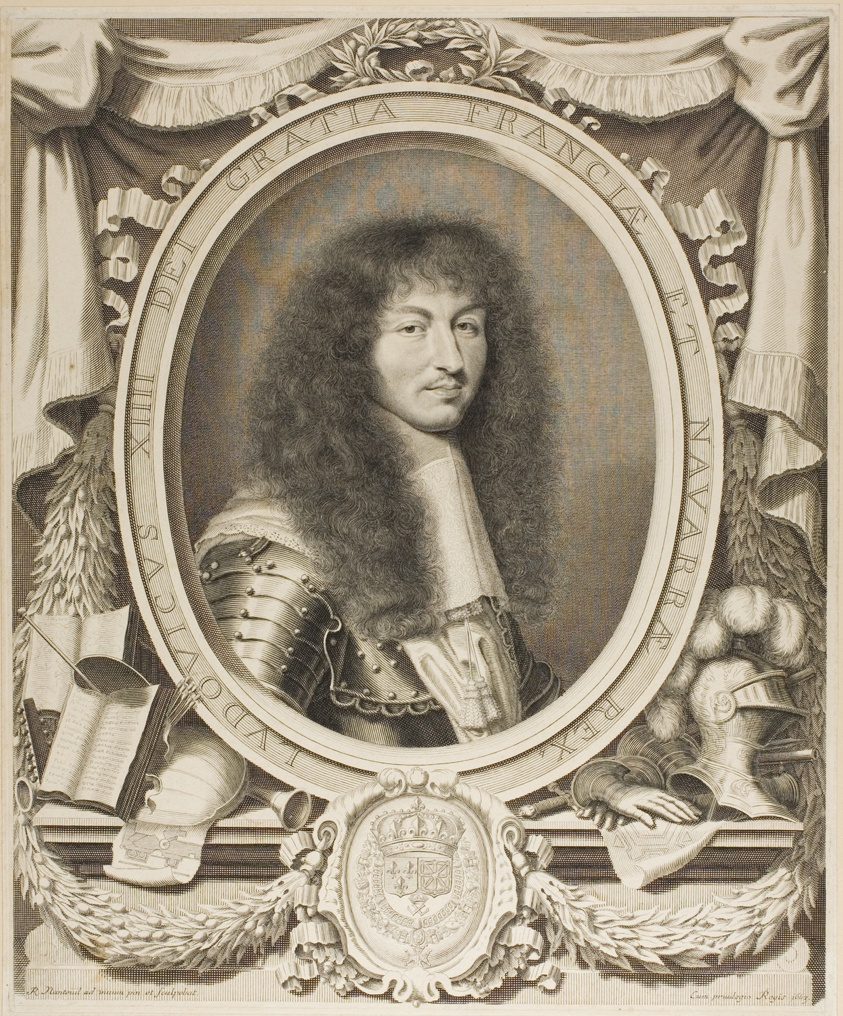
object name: Print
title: Louis XIV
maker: Robert Nanteuil (French, 1623-1678)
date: 1663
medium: Engraving in black on paper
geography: France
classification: engraving; print; prints and drawing